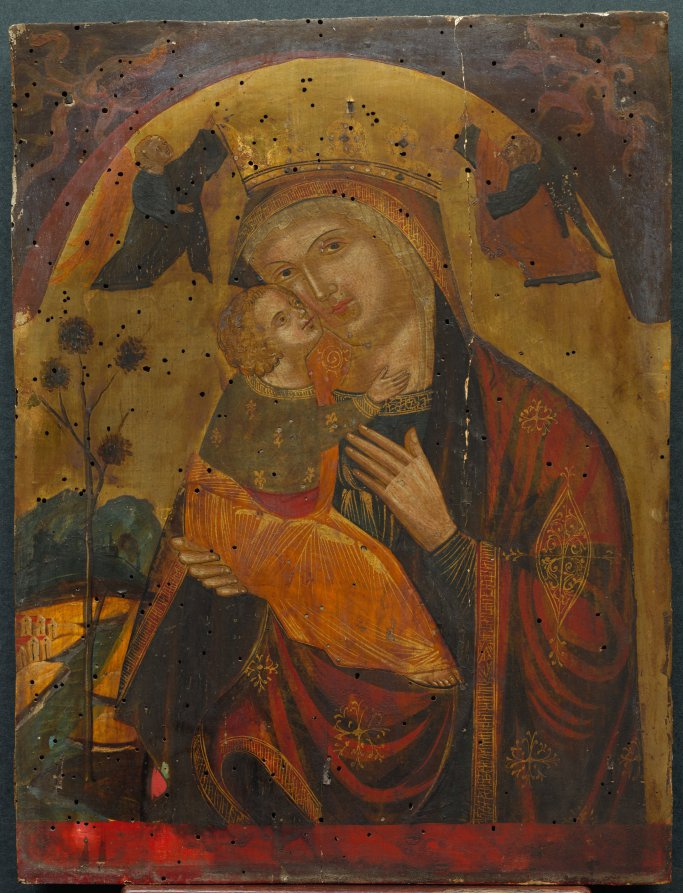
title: Virgin and Child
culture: Byzantine (Dalmatian?), 15th century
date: 1400s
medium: tempera and gold on wood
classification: Painting